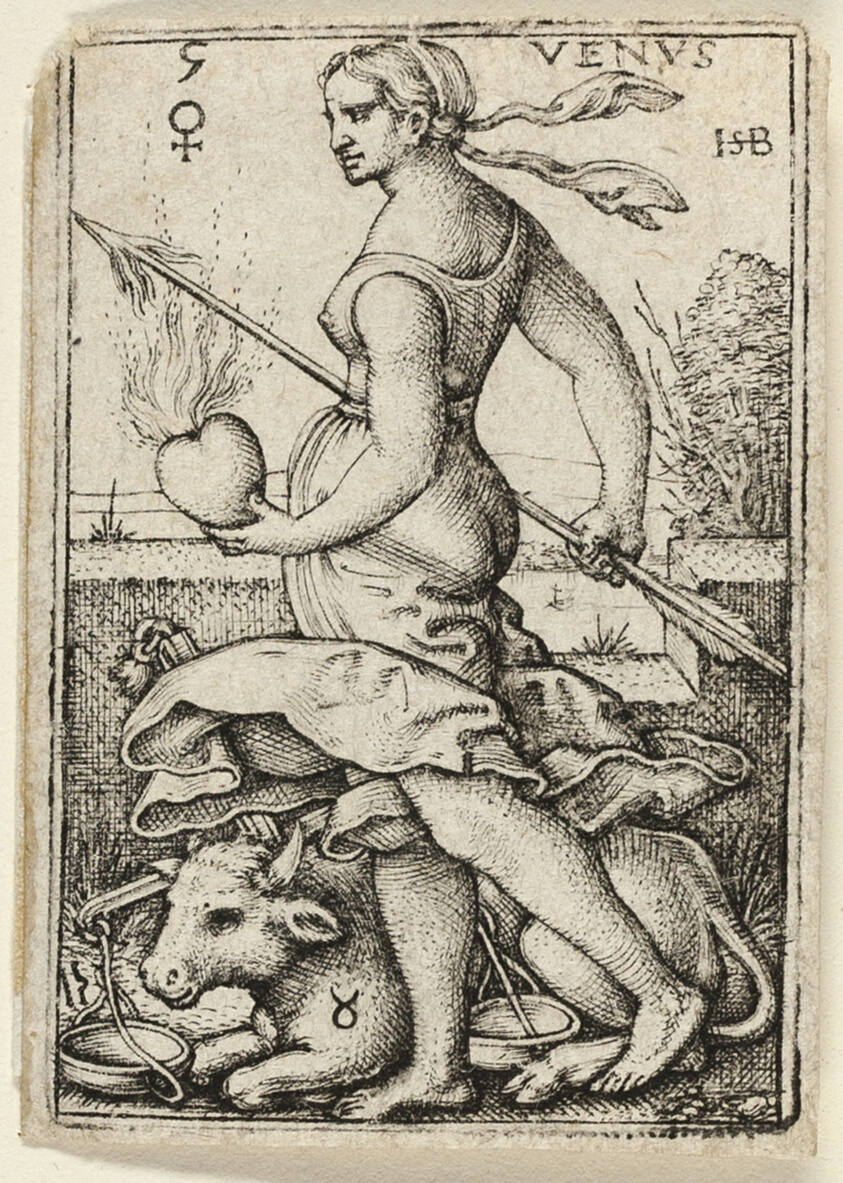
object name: Print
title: Venus, plate five from The Seven Planets with the Zodiacs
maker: Sebald Beham; German, 1500-1550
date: 1539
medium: Engraving in black on ivory laid paper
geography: Germany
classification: engraving; prints and drawing; print